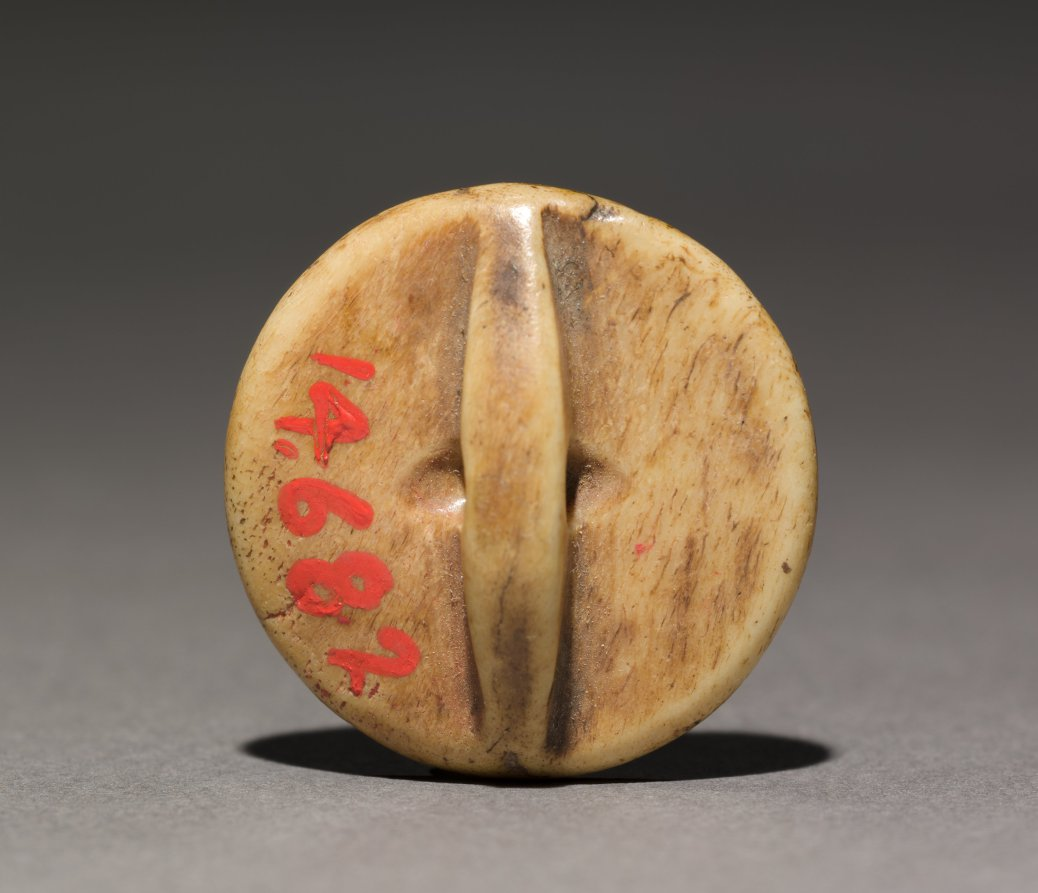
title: Seal Amulet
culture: Egypt, Old Kingdom (2647–2124 BCE), Dynasties 5–6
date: 2300–2124 BCE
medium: bone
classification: Amulets